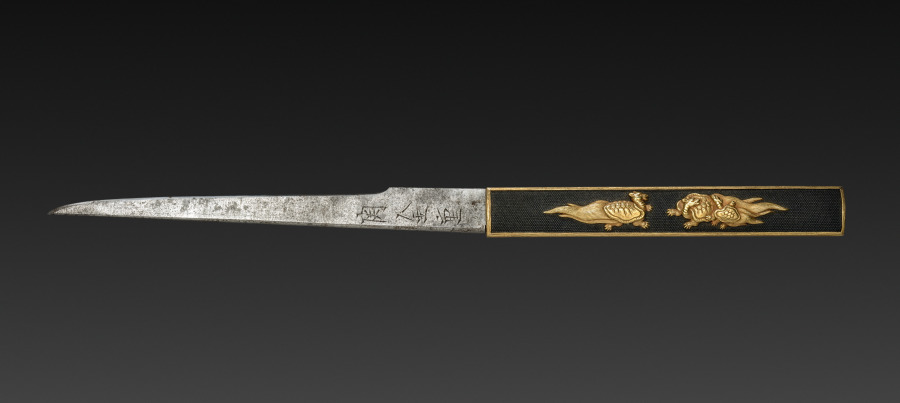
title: Blade with Handle (Kozuka) with Family of Tortoises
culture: Japan, Edo period (1615–1868)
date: 1615–1868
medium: metal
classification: Metalwork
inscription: blade signed: 関金重